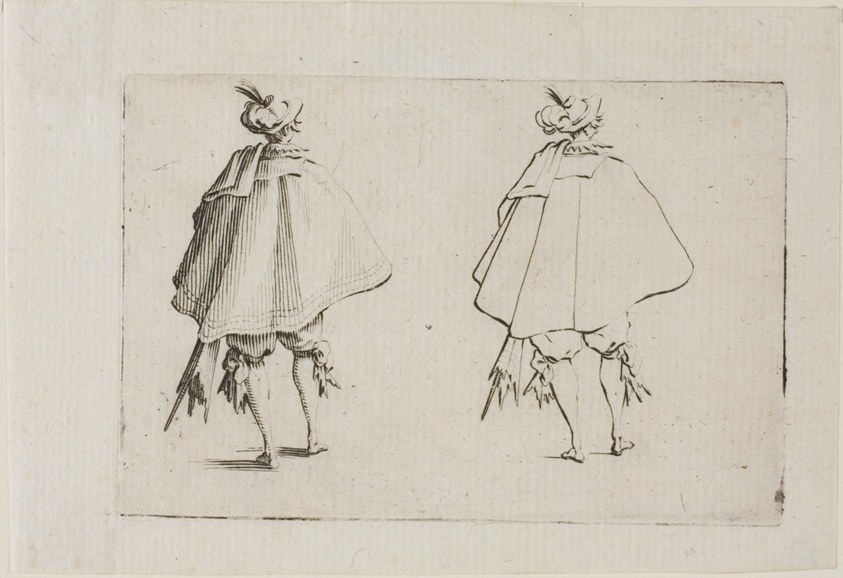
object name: Print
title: The Gentleman with a Large Coat, Seen from the Back, from The Caprices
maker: Jacques Callot (French, 1592-1635)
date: c. 1622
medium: Etching on ivory laid paper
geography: France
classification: etching; print; prints and drawing